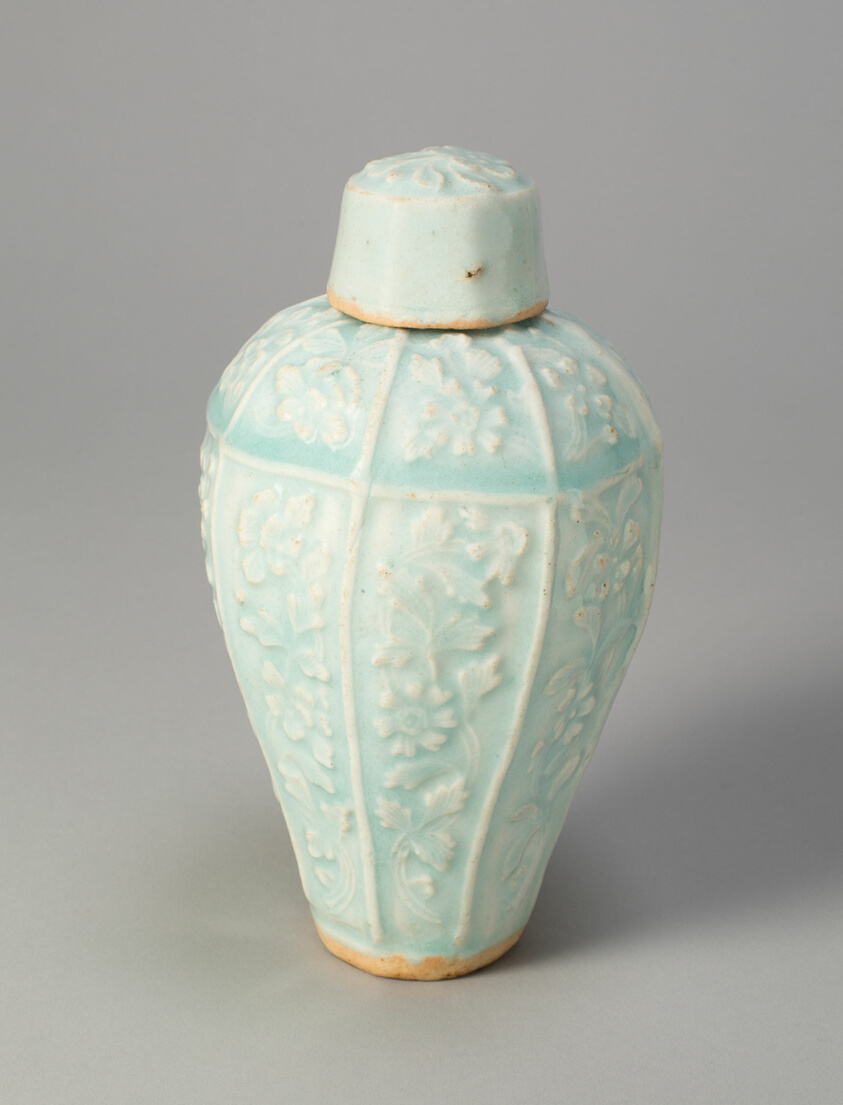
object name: Vessel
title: Covered Vase with Floral Scrolls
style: Chinese (culture or style)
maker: China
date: Song dynasty (960–1279)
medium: Qingbai ware; stoneware with underglaze mold-impressed decoration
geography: China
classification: vase; vessel; asian art; ceramics